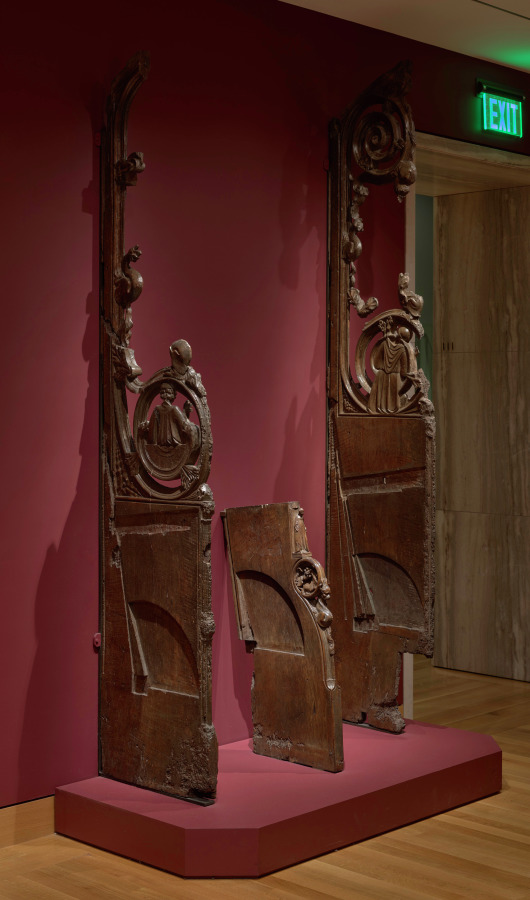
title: Pair of Panels from a Choir Stall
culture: Spain, Catalonia, Monastery of Pedralbes, 14th century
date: c. 1330–1340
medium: walnut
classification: Furniture and woodwork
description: The two larger panels-shown here in a fanciful arrangement-were probably the end panels of two stalls that faced each other across the choir of a Gothic church. The third and smaller panel originated from an interior portion of one of these stalls. The first large panel is carved with the figure of St. Francis of Assisi kneeling in prayer and receiving the stigmata. Two standing figures also appear on this panel: a nun at the left (perhaps St. Claire) and a female martyr at the right. Below is St. Michael and the dragon. The second large panel depicts a seated pope, possibly Urban IV, who holds the keys of St. Peter and a book. The small panel shows a female figure in a long gown standing on a plinth above two of the apocalyptic beasts, the winged lion of St. Mark and the winged ox of St. Luke, which are supported by a wyvern (a heraldic winged dragon). Both sides of this interior panel are intended to receive the missing seats.